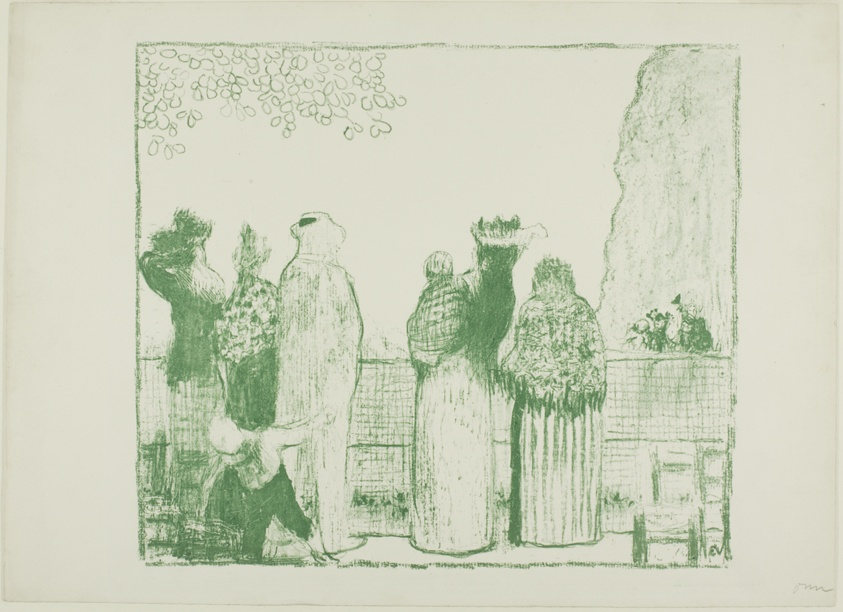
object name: Print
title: The Tuileries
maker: Edouard Jean Vuillard; French, 1868-1940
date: 1895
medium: Color lithograph on ivory wove paper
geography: France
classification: lithograph; print; prints and drawing